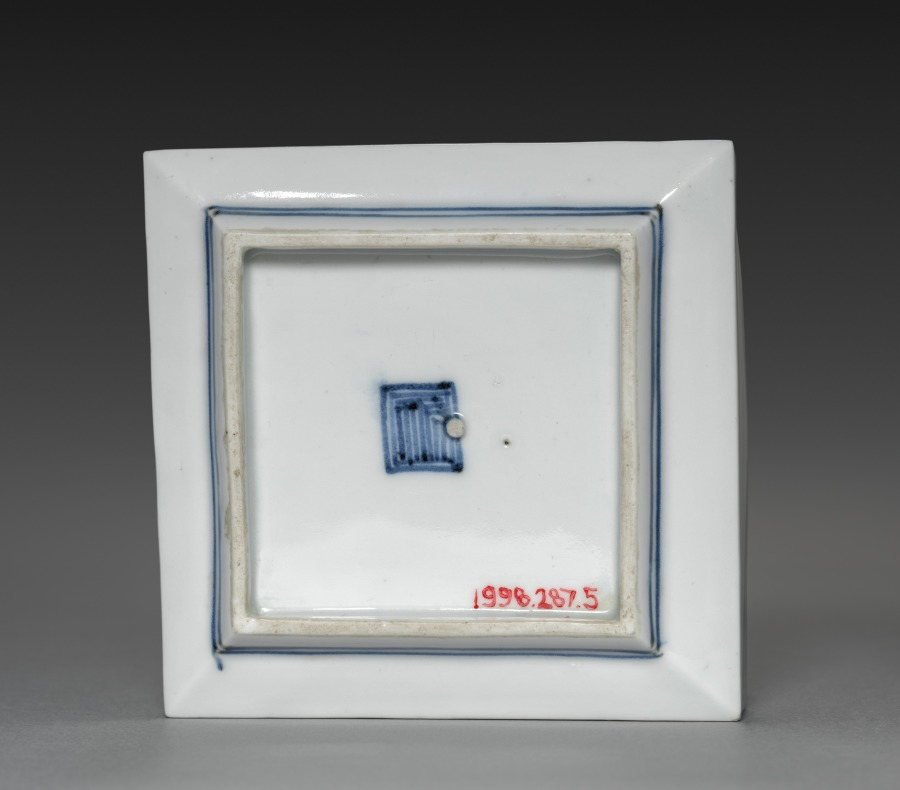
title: Side-Dish with Dandelion in Rocks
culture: Japan, Edo period (1615–1868)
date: 1700s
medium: One of a set of five dishes; porcelain with underglaze blue and overglaze iron oxide (Arita ware, Kutani style)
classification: Ceramic